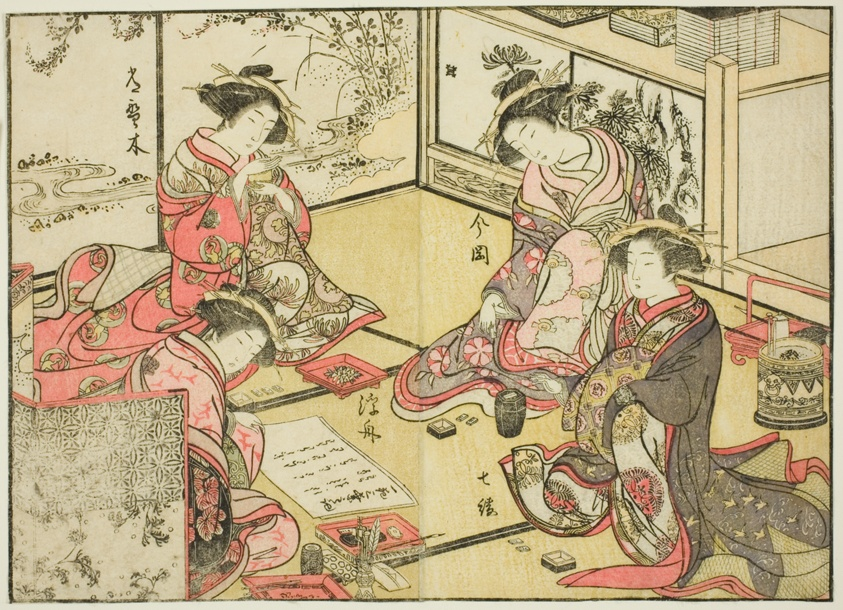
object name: Print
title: Courtesans of the Kadokaneya, from the book "Mirror of Beautiful Women of the Pleasure Quarters (Seiro bijin awase sugata kagami)," vol. 2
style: Japanese (culture or style)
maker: Katsukawa Shunsho; Japanese, 1726-1792; Kitao Shigemasa; Japanese, 1739-1820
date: 1776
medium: Color woodblock print; double-page illustration cut from a book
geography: Japan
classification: woodblock print; print; asian art